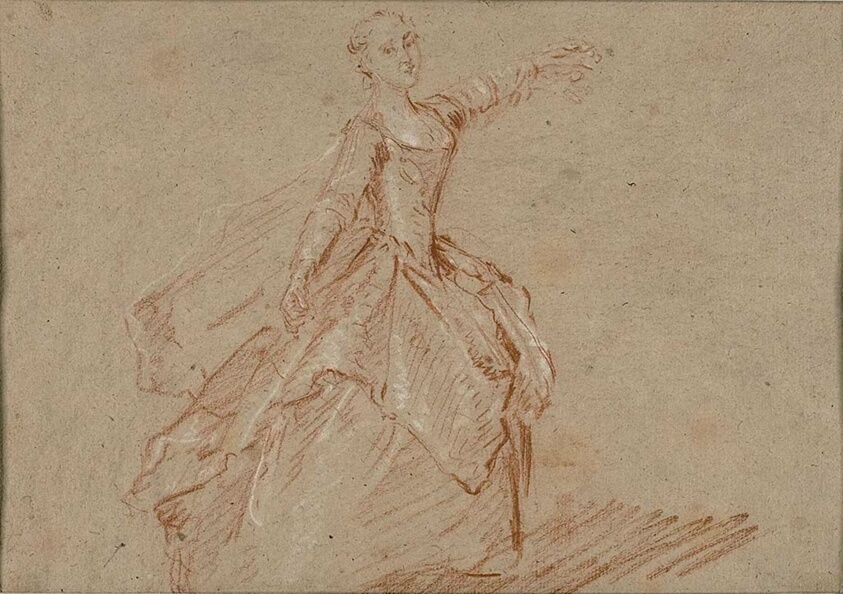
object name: Drawing and Watercolor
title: Study for The Dance Between the Pavilion and the Fountain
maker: Nicolas Lancret (French, 1690-1743)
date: c. 1732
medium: Red and white chalk on brown laid paper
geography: France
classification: chalk; drawings (visual works); prints and drawing